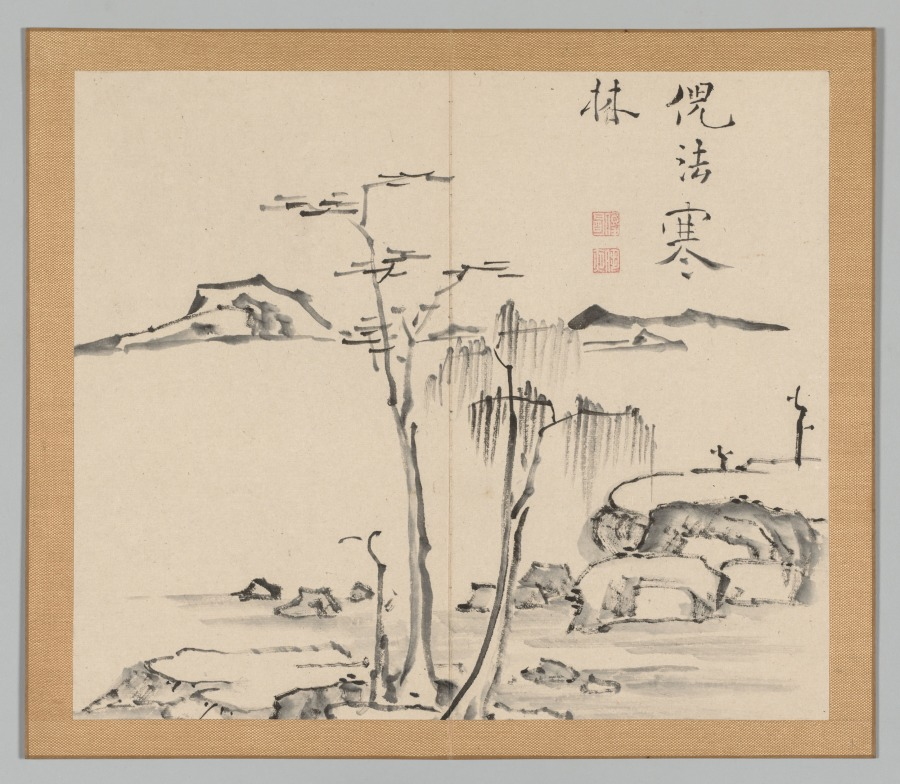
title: Reverberations of Taiga, Volume 2 (leaf 15)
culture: Japan, Edo period (1615–1868)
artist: Aoki Shukuya (Japanese, d. 1802)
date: mid- to late 1700s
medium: double-leaf from a pair of albums; ink and light color on paper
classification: Portfolio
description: Traditionally, young painters in Japan began their studies with an established master-painter. The master's compositions invariably became models that the apprentice copied to learn various ink and brush techniques. Shukuya was a pupil of the famous Kyoto artist Ikeno Taiga, whose style is reflected in these sketches of rocks, trees, and mountains.